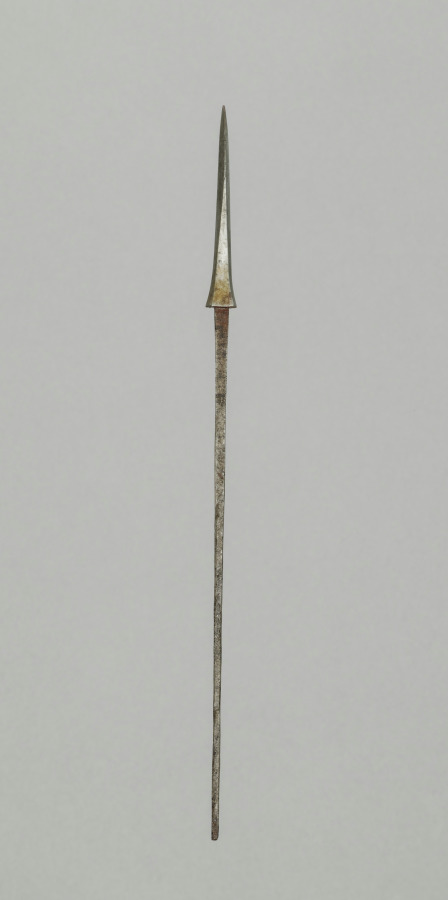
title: Arrow Point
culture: Japan, Edo period (1615–1868)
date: 1700s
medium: steel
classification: Arms and Armor